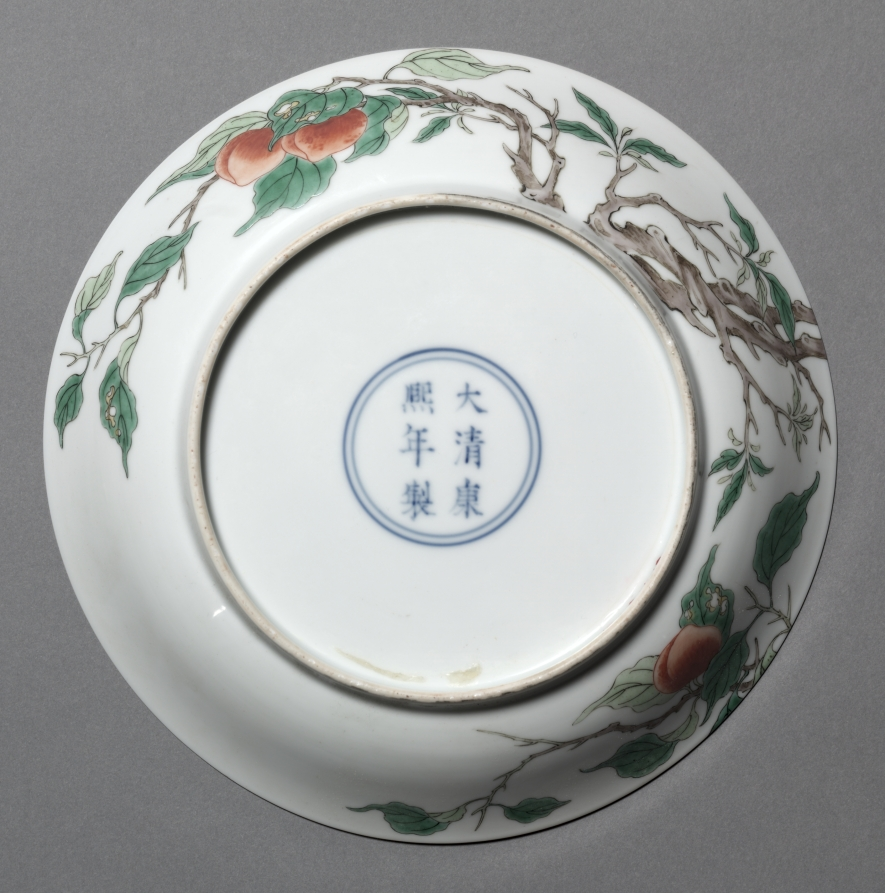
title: Dish with Bird on Fruit Tree Branch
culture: China, Jiangxi province, Jingdezhen kilns, Qing dynasty (1644–1911), Kangxi mark and reign (1662–1722)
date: 1662–1722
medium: Porcelain with famille-verte overglaze enamel decoration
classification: Ceramic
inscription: 大清康熙年制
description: Among the greatest achievements of early Qing porcelain are table wares and display objects decorated with polychrome painting like this pair of dishes. Featuring birds perched in peach trees, the dishes are related to the famous birthday set commissioned for the Kangxi emperor’s sixtieth birthday in 1713. These pieces are more inventive than those in the 1713 set, however, since the unframed ornament is allowed to continue unbroken from the outer to inner surfaces and back out again, thus transforming each vessel into a three-dimensional canvas.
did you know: By the early eighteenth century, the imperial kilns at Jingdezhen were producing exceptionally fine pieces on a staggering scale.